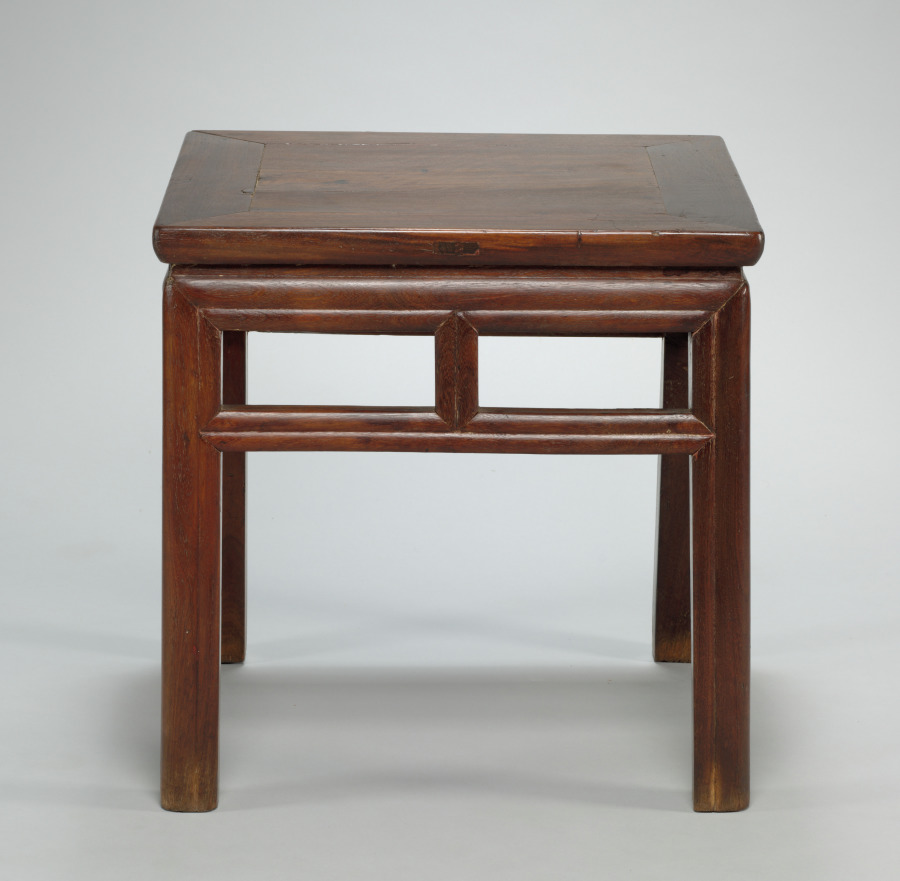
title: Stool (2 of 2)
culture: China, Qing dynasty (1644-1911)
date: 1700–1725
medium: Chicken-wing wood (jichimu)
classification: Furniture and woodwork